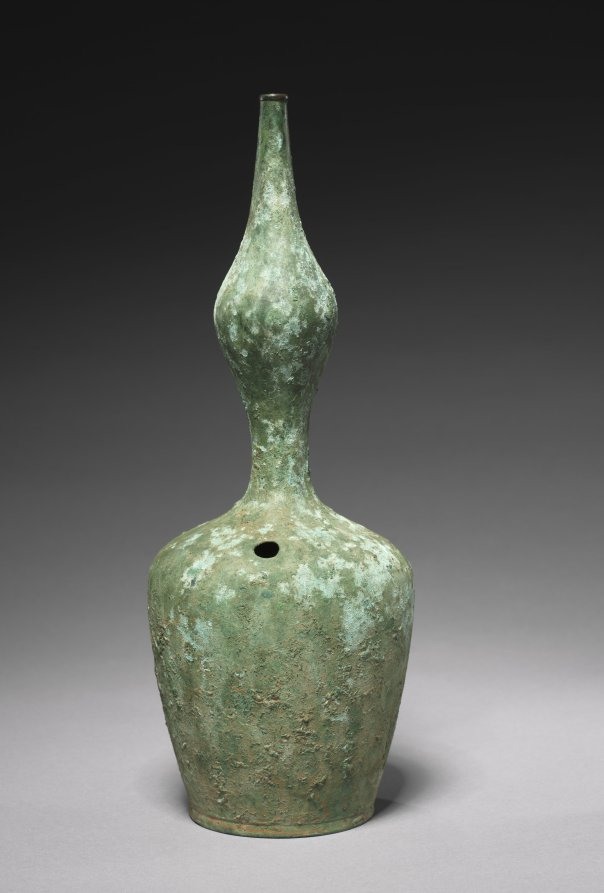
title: Gourd-Shaped Bottle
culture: Korea, Goryeo dynasty (918–1392)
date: 918–1392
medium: bronze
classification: Metalwork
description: As early as the seventh century, the practice of drinking tea and wine became an important part of elite culture in Korea. Elites of the Goryeo period commissioned a variety of types of ceramic and metal utensils including this bronze bottle, not only to make their drinking experience more exciting, but also to show their appreciation of nature.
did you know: This gourd-shaped bottle may have been used to serve wine.